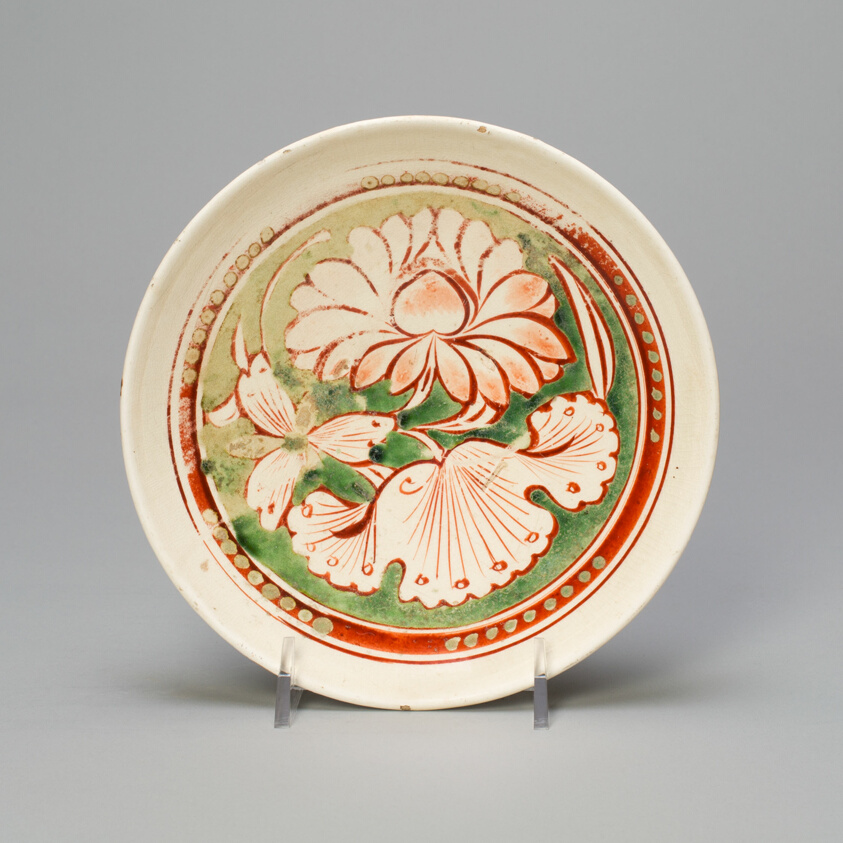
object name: Vessel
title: Shallow Bowl with Lotus Flower and Leaves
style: Chinese (culture or style)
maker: China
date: Jin dynasty, (1115–1234), 13th century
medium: Cizhou ware; stoneware, slip-coated with decoration in overglaze red, yellow, and green enamel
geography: China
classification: bowl; stoneware; dish (vessel); asian art; ceramics; vessel